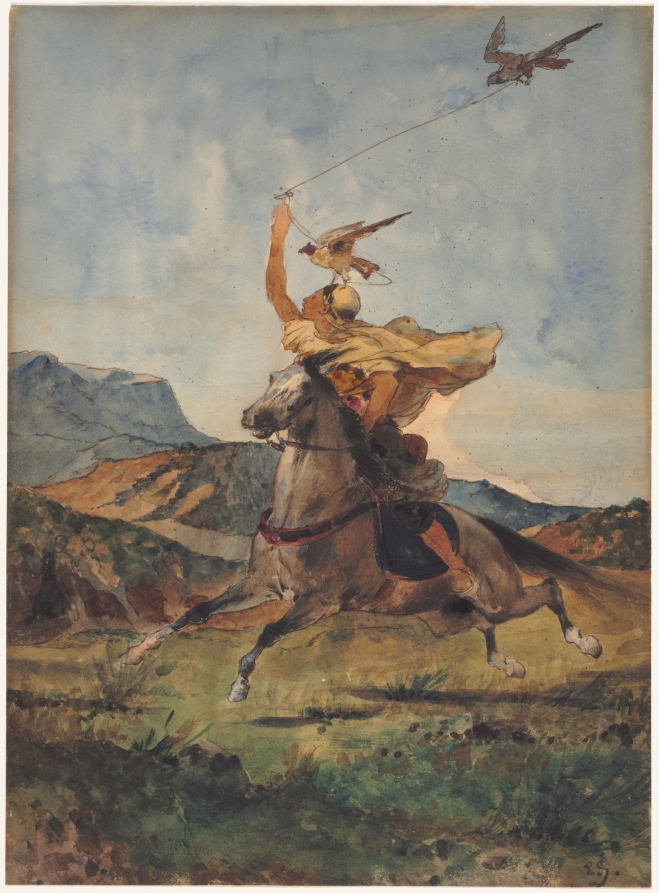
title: The Falconer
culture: France, 19th century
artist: Eugène Fromentin (French, 1820–1876)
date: c. 1864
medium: watercolor with pen and brown ink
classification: Drawing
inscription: inscribed, lower right, in brown ink: E.F.